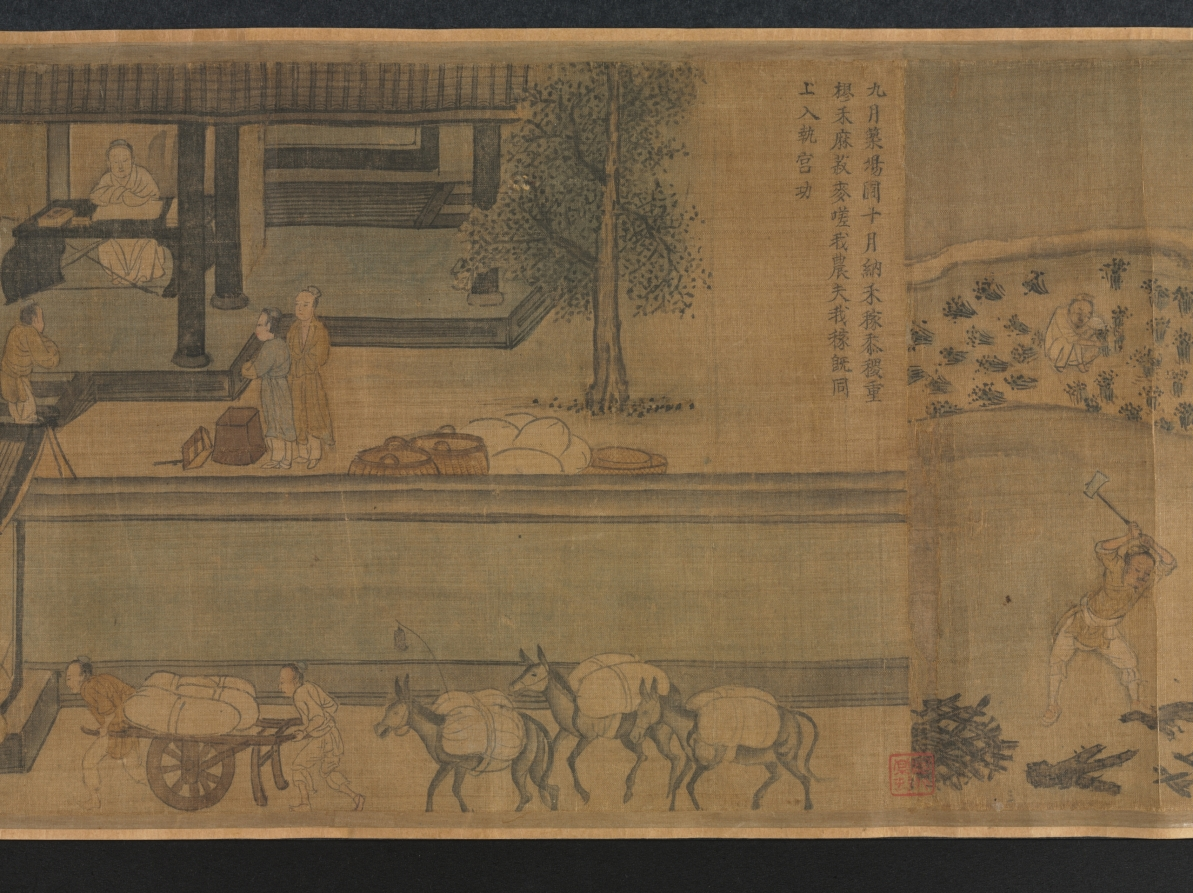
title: "Seventh Month" from the Odes of Bin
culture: China, Southern Song dynasty (1127-1279)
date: 1200s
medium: Handscroll; ink and color on silk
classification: Painting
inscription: Colophons: 1. [on the frontispiece] by the Qianlong emperor (dated 1741). 2. by Lu Wan (dated Zhengde dingchou, 1517). 2. by the Jiaqing emperor (dated 1807).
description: According to Confucian thought, the ruler looks after the well-being of his people which involves agricultural activities. Seventh Month from the ancient Odes of Bin in the Shijing (Book of Poetry) describes occupations throughout the year, including plowing, harvesting, hunting, making clothes, and observing rituals. The earliest illustrations of these Odes accompanied by text were commissioned by Southern Song emperor Gaozong (reigned 1127–1162). As the lower Yangzi delta had become the new seat of government, Gaozong had sets of these illustrations produced by court artists to revive the dynasty and convince the Confucian officialelite of his legitimacy to rule.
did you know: The Odes of Bin appears in the classic Shijing (Book of Poetry), an anthology of more than 300 poems, folk songs, and ceremonial hymns that were originally chanted to music.